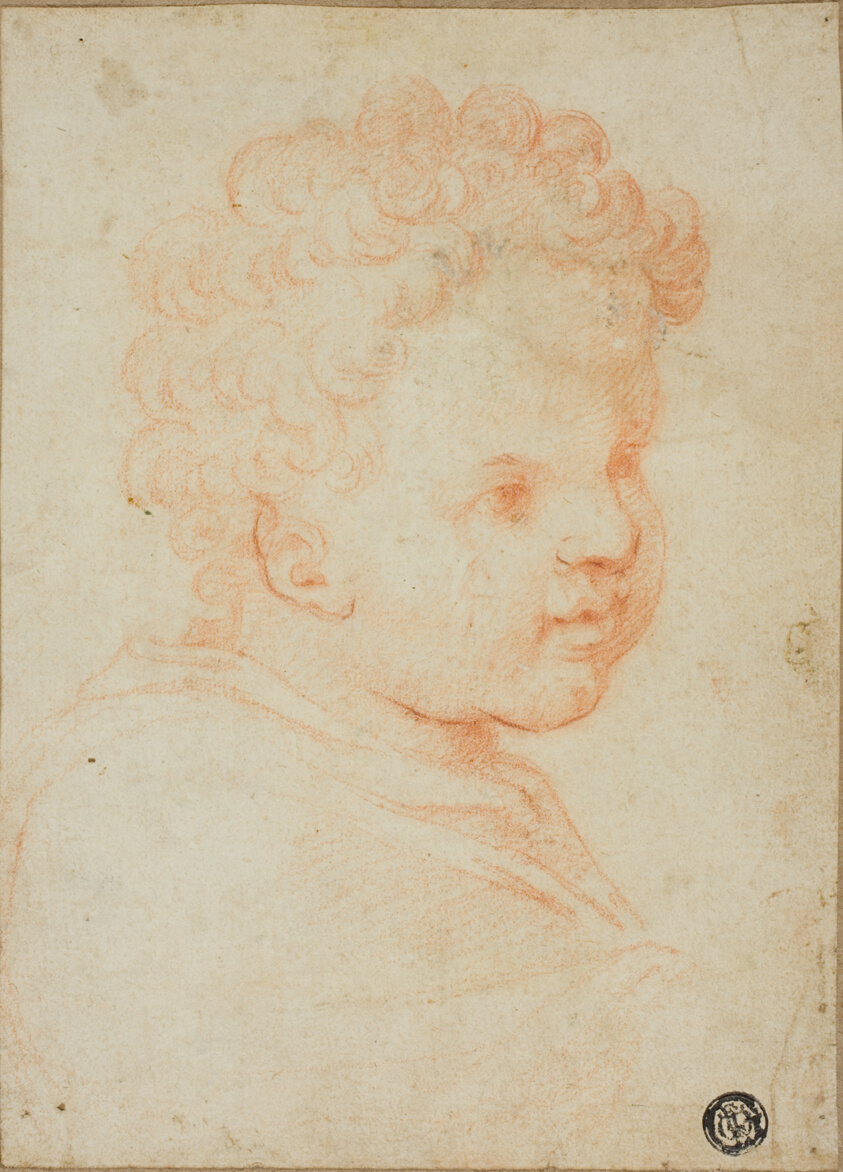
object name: Drawing and Watercolor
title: Head of a Child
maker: Unknown Artist; Italian. mid-16th centlury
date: 1550/59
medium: Red chalk on ivory laid paper, laid down on brown laid paper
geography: Italy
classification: chalk; drawings (visual works); prints and drawing